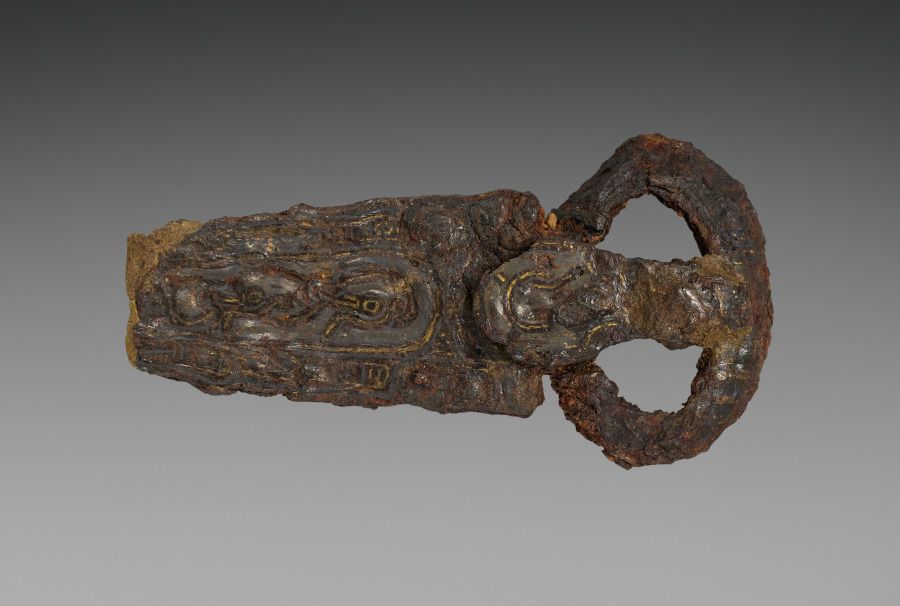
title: Buckle (tongue, loop and clasp)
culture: Merovingian, Burgundian, Migration period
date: 600s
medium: iron with silver overlay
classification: Jewelry